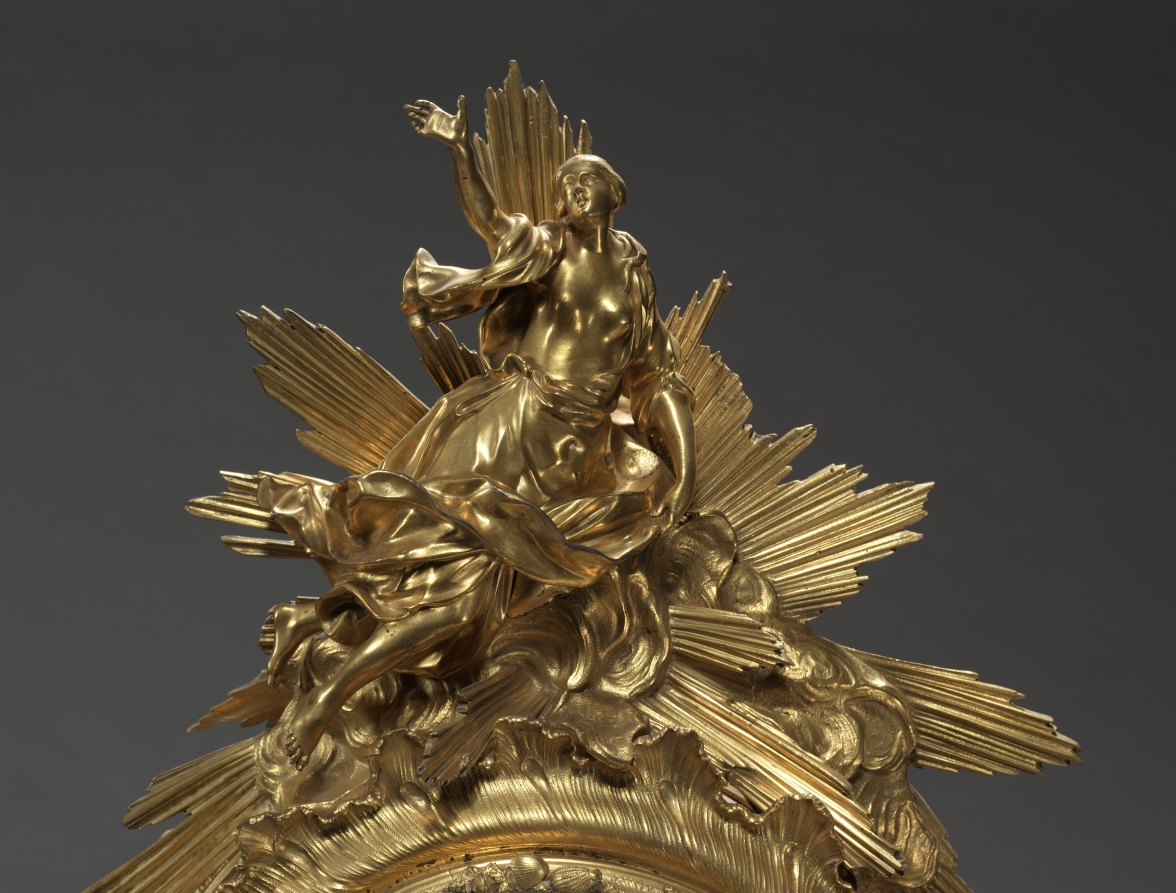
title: Clock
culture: France, 18th century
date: c. 1750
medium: gilt bronze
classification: Furniture and woodwork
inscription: on clock face: JOUARD A PARIS; engraved on plaque attached to back of clock face: Jouard Paris.